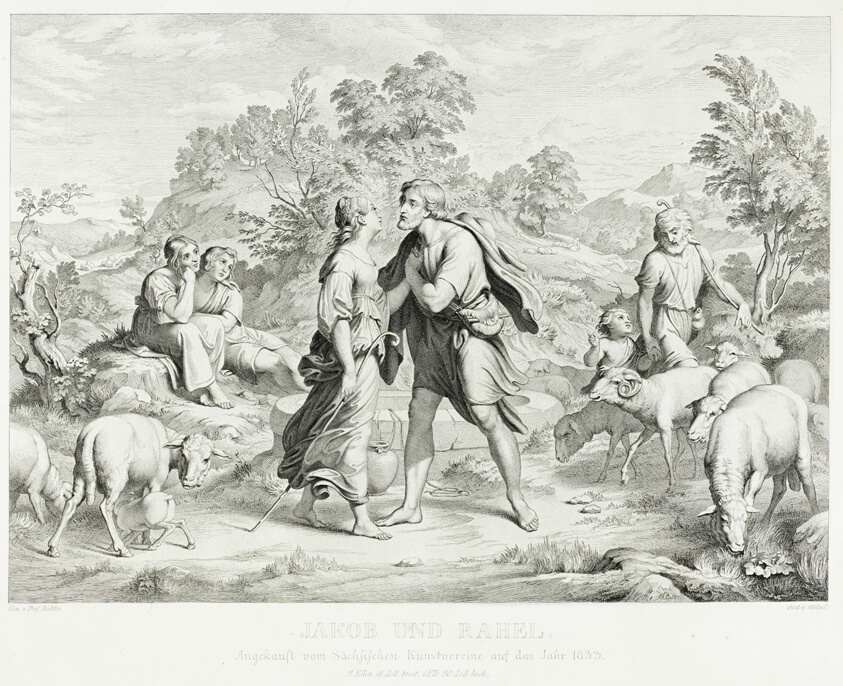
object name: Print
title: Jacob and Rachel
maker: Christian Ernst Stözel (German, 1792–1837); after August Richter (German, 1803–1884)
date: 1833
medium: Engraving in black on ivory wove paper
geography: Germany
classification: engraving; paper; print; prints and drawing